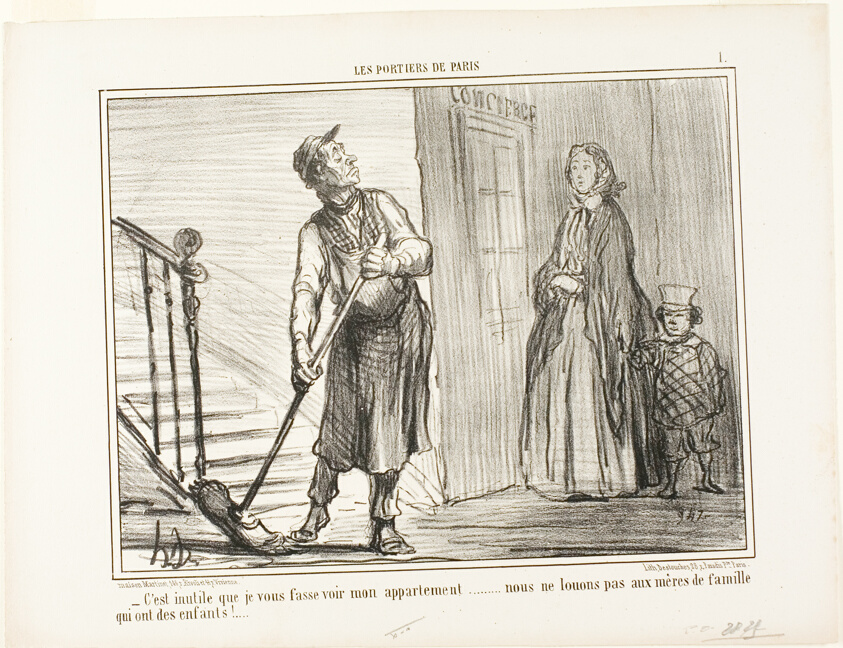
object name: Print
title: “- It's useless to show you my apartment. We are not renting out to mothers with children,” plate 1 from Les Portiers De Paris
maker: Honoré Victorin Daumier; French, 1808-1879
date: 1856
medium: Lithograph in black on ivory wove paper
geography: France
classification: lithograph; print; prints and drawing